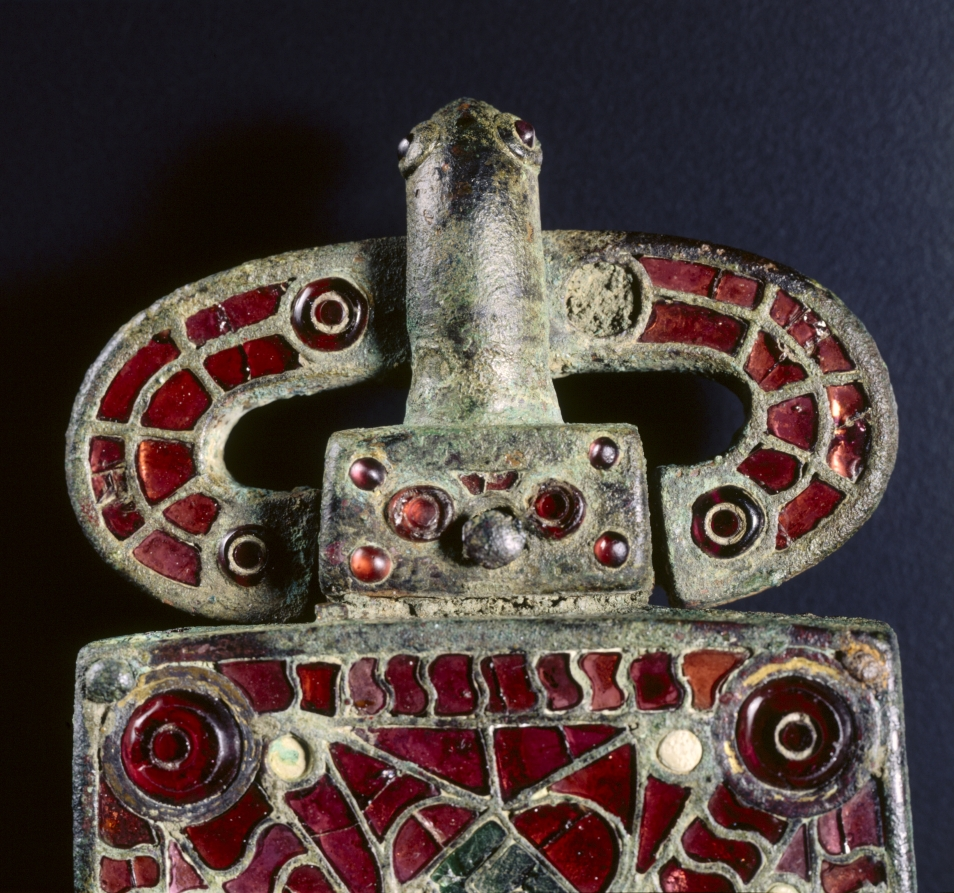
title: Belt Buckle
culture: Visigothic, Spain, Migration Period, 6th century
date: c. 525–560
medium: bronze with garnets, glass, mother of pearl, gold foil, traces of gilding; bronze and glass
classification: Jewelry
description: The art of the European Migration Period (3rd-7th centuries AD) is almost exclusively one of personal adornment-a portable art that followed men and women to their graves. Belt buckles with large rectangular attachment plates have been discovered in cemeteries across the Iberian Peninsula-now occupied by Spain and Portugal-from the period of Visigothic occupation (about AD 412-711). Their decoration varies. Finer examples, like this one, are distinguished by brilliantly inlaid semi-precious stones and colored glass. Garnets were especially prized in Visigothic society for use in cloisonné jewelry. The technique involved the fitting of carefully cut pieces of polished garnet into an intricate grid of compartments, or cloisons. This buckle is so densely inlaid with garnets that it presents a virtual "carpet" of red to the eye. These large Visigothic buckles are strikingly uniform in shape yet endlessly varied in surface design, perhaps a sign that they expressed the personal identities of their original owners. Grave excavations have shown that belt buckles of this type were made for women.